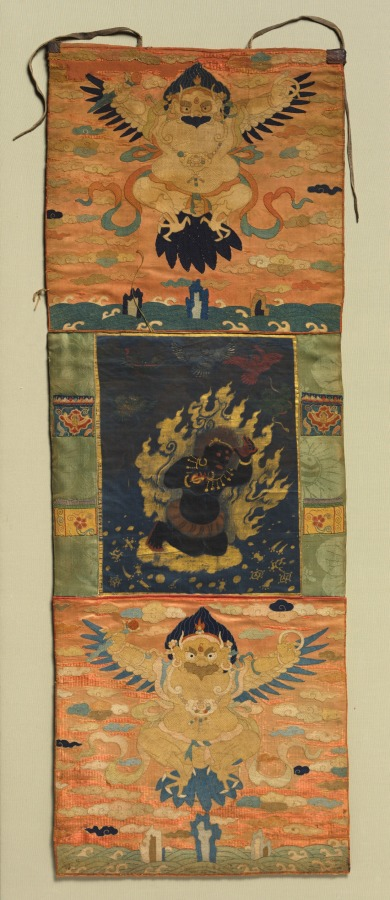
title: Vajrapani and Garuda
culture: China and Tibet, Embroidery: China, Yuan dynasty (1279–1368); painting: Tibet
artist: attributed to Choying Dorje, the Tenth Black Hat Karmapa (Tibetan, 1604–1674)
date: painting c. 1650; top and bottom borders c. 1350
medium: Painting: gum tempera, gold, and silver on silk; lateral borders: silk damask with needleloop embroidery; top and bottom panels: embroidered silk, lead, and silver paper; curtain: silk tabby; dowels: wood, rawhide, and leather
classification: Embroidery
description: The painting depicts the Buddhist protector who holds (pani) the thunder bolt (vajra) in his right hand. He kneels in reverence and holds his left hand in a gesture of salute. This unusual image appears to have been the vision of a Tibetan monastic patriarch known for creating his own inventive paintings and sculptures. Sewn to the painting are Chinese damask borders and rare embroideries dating to the Chinese Yuan dynasty (1279–1368). They depict man-eagle figures known as Garuda, a form occasionally assumed by Vajrapani.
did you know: Vajrapani sometimes takes the form of Garuda, enemy of snakes.